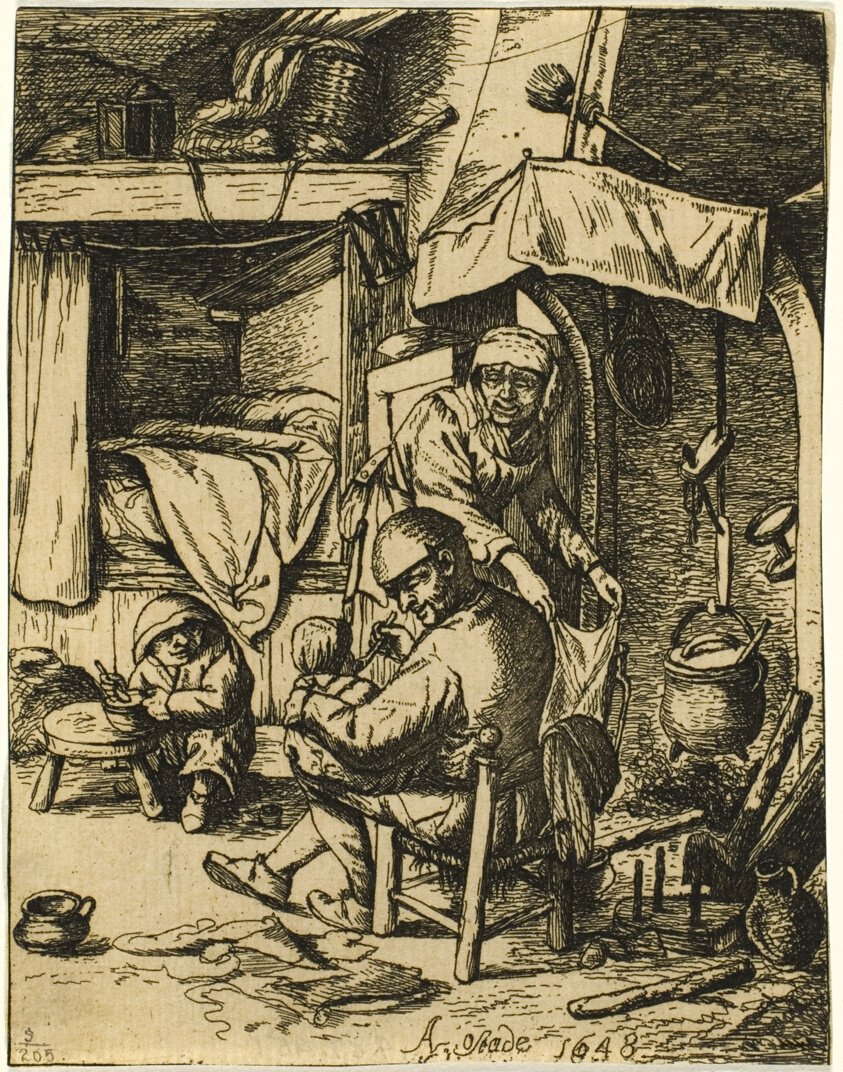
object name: Print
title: The Pater Familias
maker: Adriaen van Ostade (Dutch, 1610-1685)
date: 1648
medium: Etching in black on cream laid paper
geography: Holland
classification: etching; print; prints and drawing